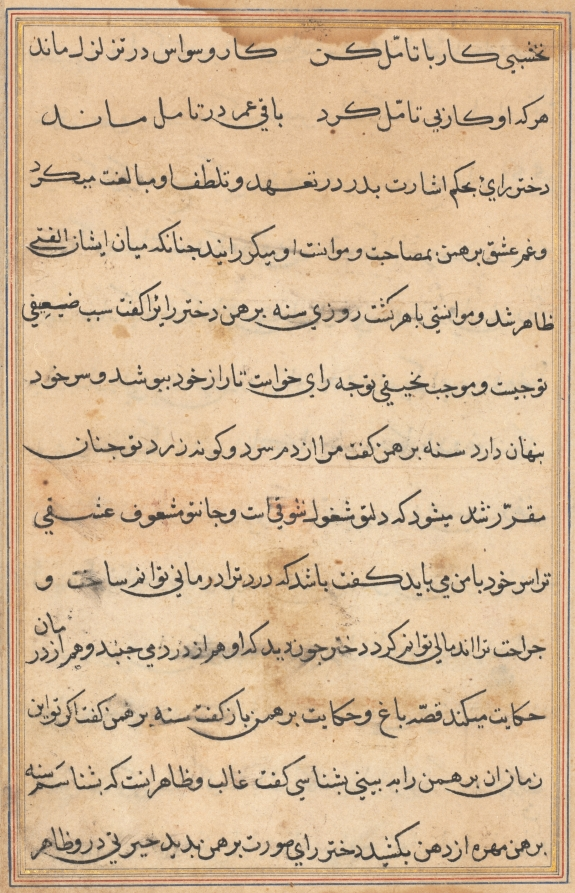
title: Page from Tales of a Parrot (Tuti-nama): text page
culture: Mughal India, court of Akbar (reigned 1556–1605)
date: c. 1560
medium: gum tempera, ink, and gold on paper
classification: Painting